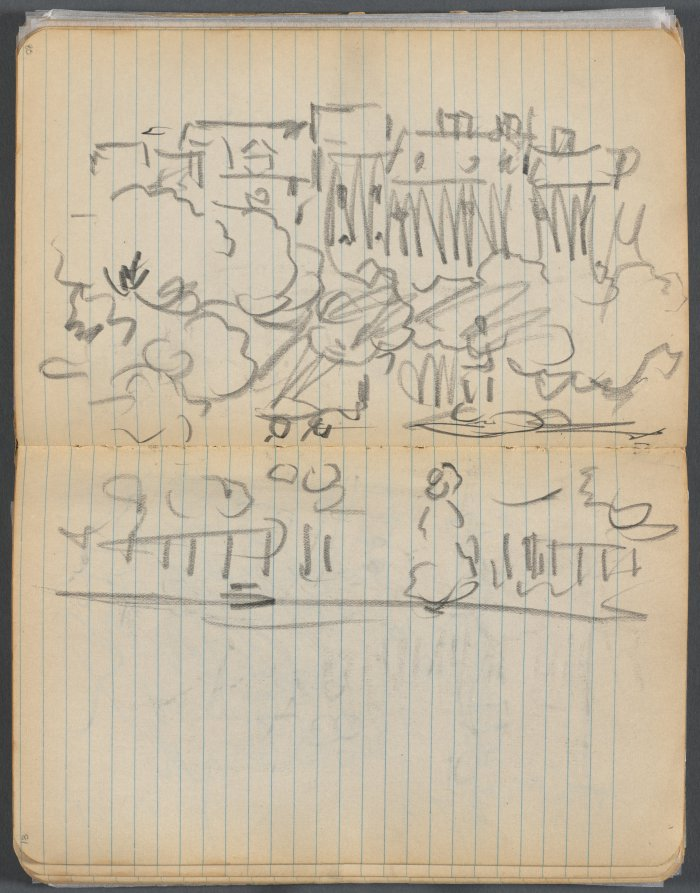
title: Sketchbook, page 080 & 81: Landscape with Figures and Houses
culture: America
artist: Maurice Prendergast (American, born Newfoundland [now Canada], 1858–1924)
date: 1905–10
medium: graphite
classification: Bound Volume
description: This sketchbook contains 69 pages of drawings, a diary largely devoted to the state of the artist's health, and a three-page discourse on the nature of genius and ideas.